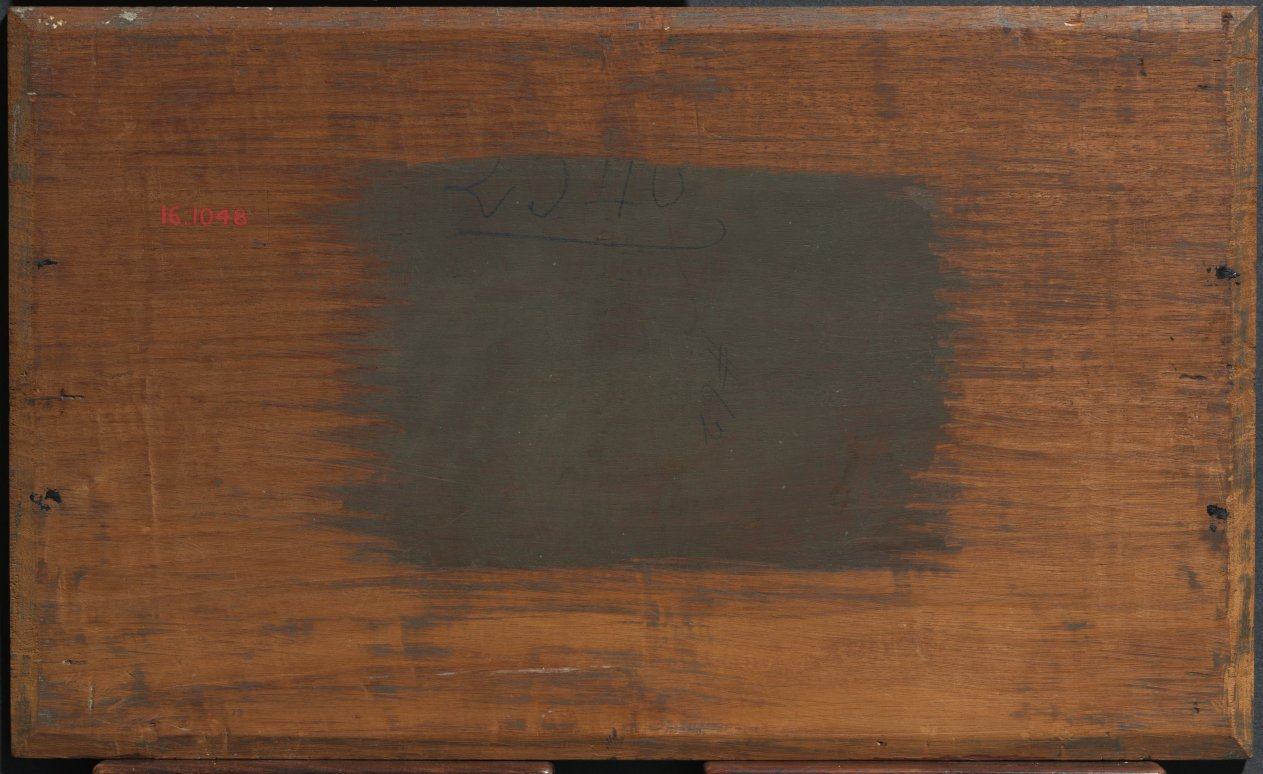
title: The Hillsides of Méry-sur-Oise, Opposite Auvers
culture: France, 19th century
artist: Charles François Daubigny (French, 1817–1878)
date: 1873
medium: oil on wood panel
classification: Painting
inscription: Signed lower left in black: Daubigny 1873